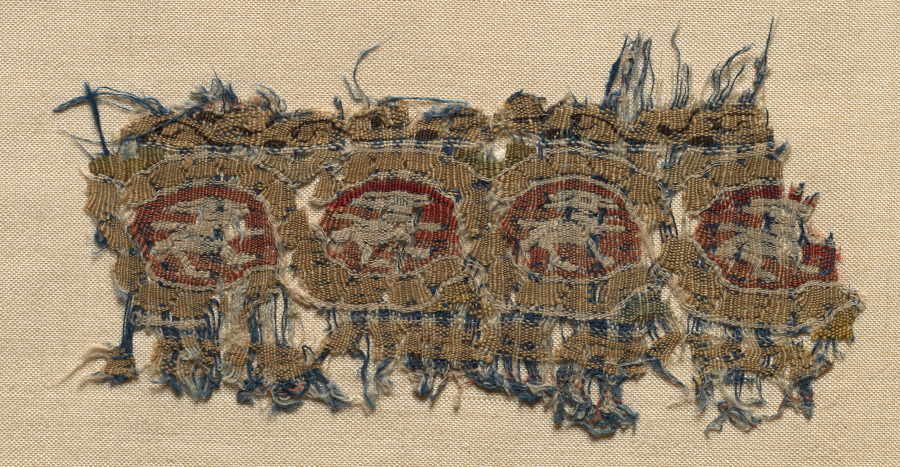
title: Fragment of a Tiraz-Style Textile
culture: Egypt, Fatimid period, latter part of Caliphate of al Mustansir or al-Musta'li, c. AH 475-495 (A.D. 1081-1101)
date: 1081 – 1101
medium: tapestry (originally inwoven in a tabby ground); linen and silk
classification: Textile